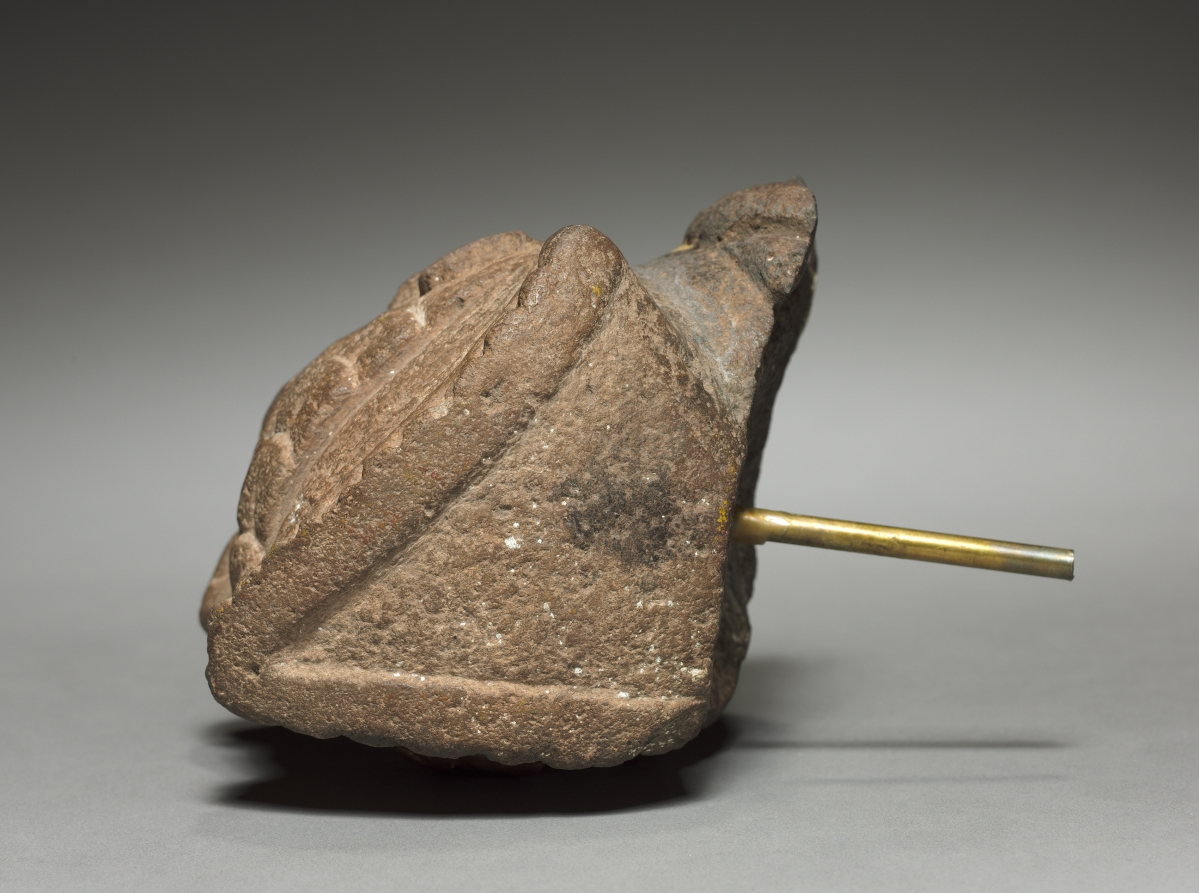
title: Head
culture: Mexico, Classic Veracruz (Totonac or Tajin)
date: 600–1100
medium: stone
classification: Sculpture